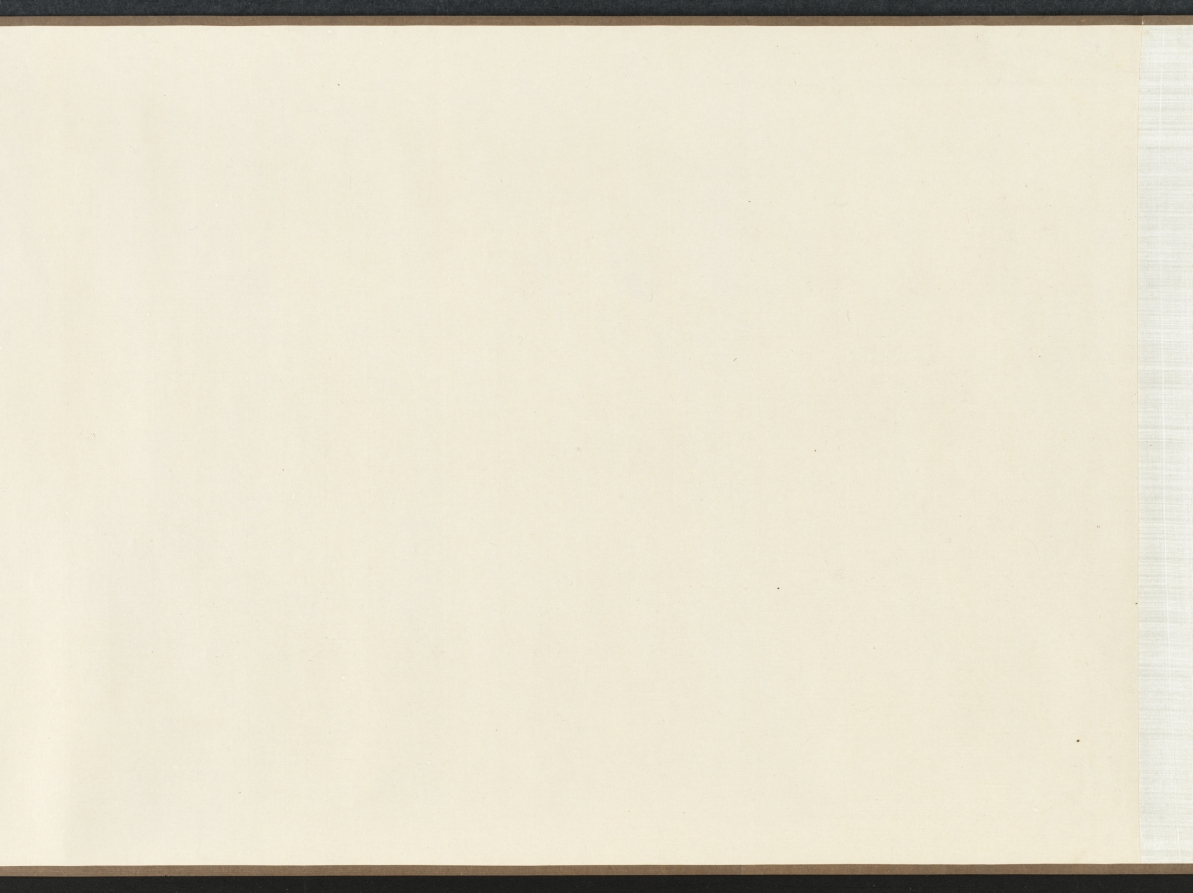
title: Ink Flowers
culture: China, Yuan dynasty (1271-1368)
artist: Zhao Zhong (Chinese, second half of the 1300s)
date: 1361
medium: Handscroll; ink on paper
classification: Painting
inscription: 寶帶同心結，香羅合歡扇。/ 繡作錦鴛鴦，雙雙為君獻。/ 薔薇露灑熏籠衣，馨香奉君君勿違。 原初并題。 [印] 趙衷原初畫記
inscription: 翠袂素羅韈，玉臺黃金盃。浩歌渡弱水。天風卷海三山開，麻姑方平為招飲，蛟宮獻舞銀濤堆。 原初并題。 [印] 雲林清趣、[印] 趙衷原初畫記。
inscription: 右用湯叔雅慶元中所寫墨花法作此卷，又效李長吉體賦詩以題之。詩與畫雖未工，要皆出於古人之餘，譬猶欲成方圓而必求其規矩之用也，識者毋誚焉！至正辛丑八月望日，東吳野人趙衷原初謹識。 [印] 趙原初、[印] 傳世清玩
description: Zhao Zhong's flowers, each paired with a poem, echo the fine-style colored flowers of the academic tradition, but instead he used only ink. Fine lines define the contours of each plant, as well as the veins within each petal and leaf. Careful ink washes give subtle modeling to the forms. The combination of lily, narcissus, and peony is unusual as the three belong to no known seasonal or symbolic system popular in the fourteenth century. Zhao’s medical training may have influenced the selection. Powdered lilies, for example, were prescribed to dispel grief, while the bark of tree peony roots was used as a treatment for various blood disorders.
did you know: This handscroll is a very rare example of ink flowers in the linear baimiao style of the fourteenth century.